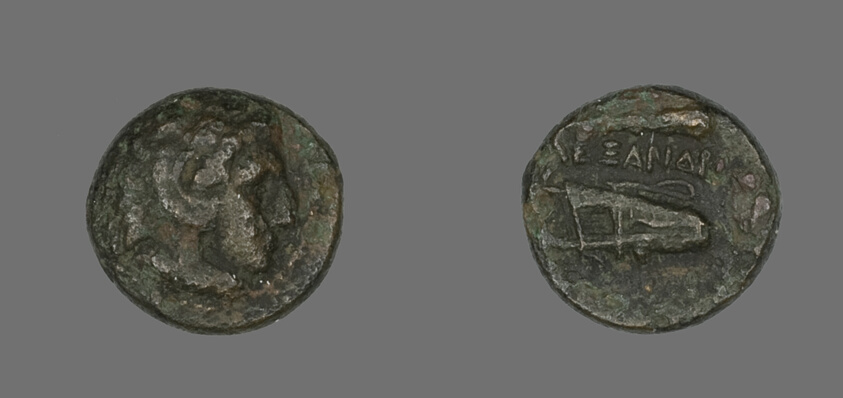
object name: Coin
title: Coin Depicting the Hero Herakles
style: greek, ancient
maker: Greek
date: 336-323 BCE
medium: Bronze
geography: Ancient Greece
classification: coin; ancient art